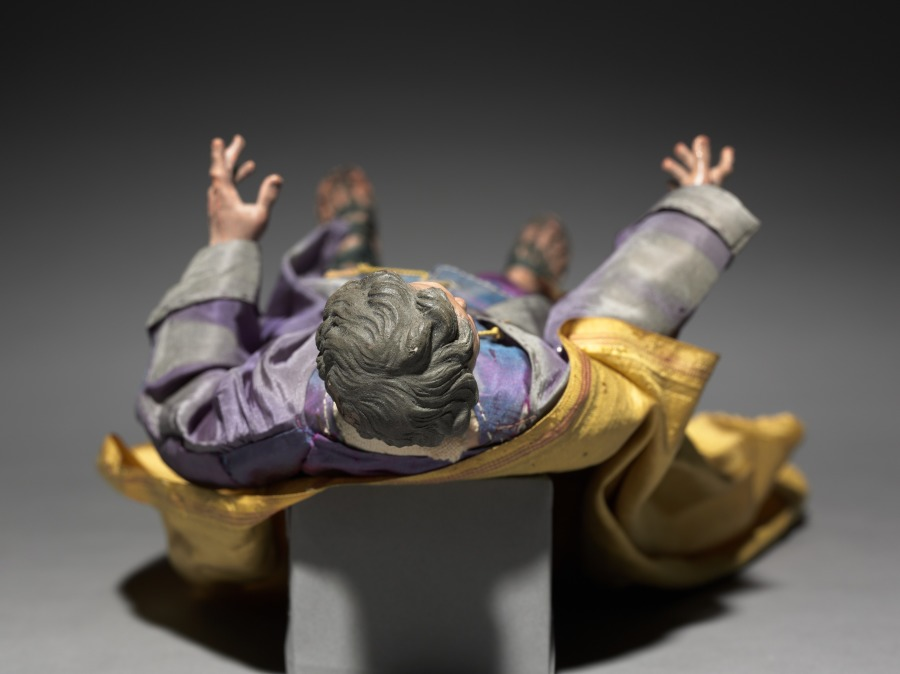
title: Figure from a Crèche: Joseph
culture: Italy, Naples, late 18th-early 19th century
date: 1780–1830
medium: painted wood and terracotta with various textiles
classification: Sculpture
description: The practice of creating scenes of the Nativity for the home dates from the early 1700s in Italy, where people began to set up doll-like figures of about a foot or less in height. The custom was particularly popular in Naples around 1800, where crèche scenes (crèche means cradle, or crib) included many figures, whose heads and hands of painted terracotta, stuffed cloth bodies, and clothing adapted from contemporary local costumes gave them an amazingly realistic character. Representations of the birth of Jesus can be traced to the first few centuries of Christianity. Both living creatures and sculptural depictions of them were used from early times. By the late middle ages it was customary to create life-size figures of wood or stone, naturalistically painted, to represent the characters who participated in the events of Jesus's early life. These sculptures were then arranged in scenes illustrating one or both of the most important of these events, the Adoration of the Shepherds and the Adoration of the Magi-the three kings from the East who came to pay homage to the Christ child. Used in churches, these large figures were especially popular in Italy, Central Europe, Spain, and Portugal.